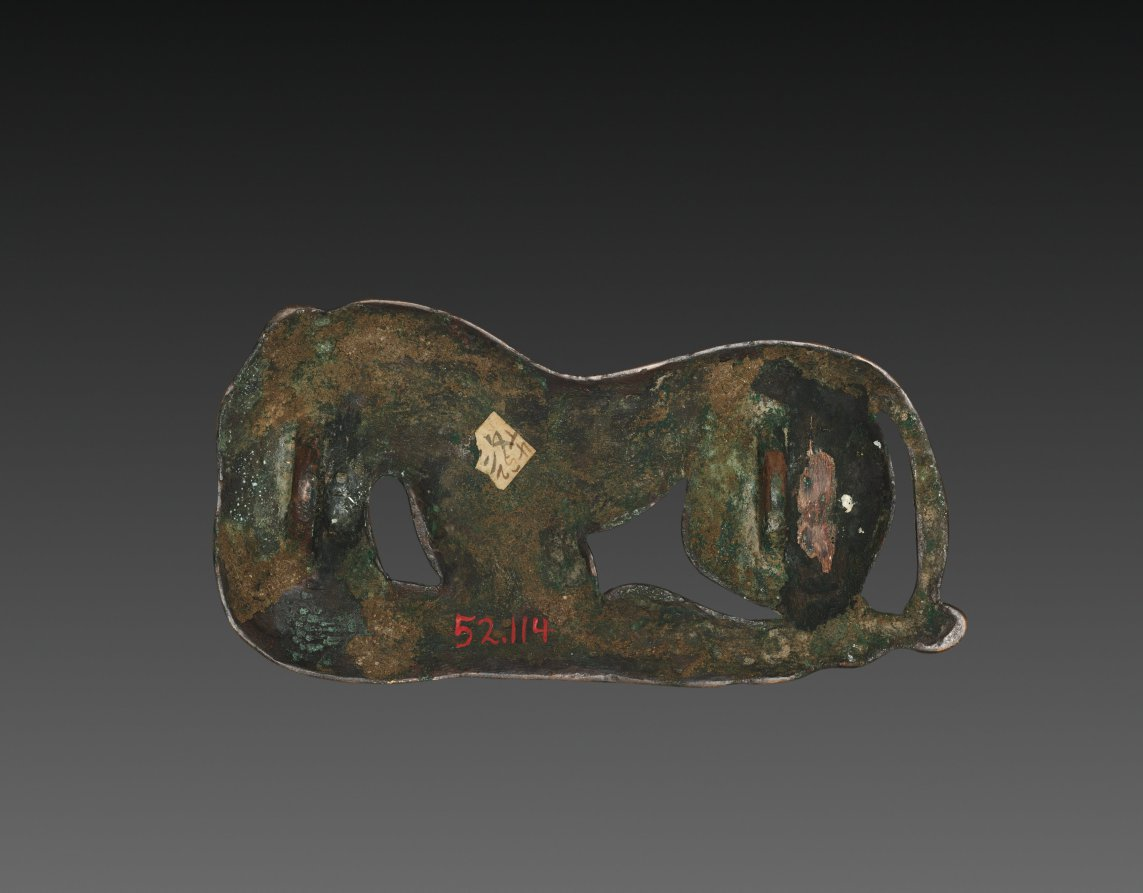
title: Ornament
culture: China, Ordos Region, Han dynasty (202 BCE–220 CE)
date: 206 BCE–220 CE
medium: gilt bronze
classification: Metalwork